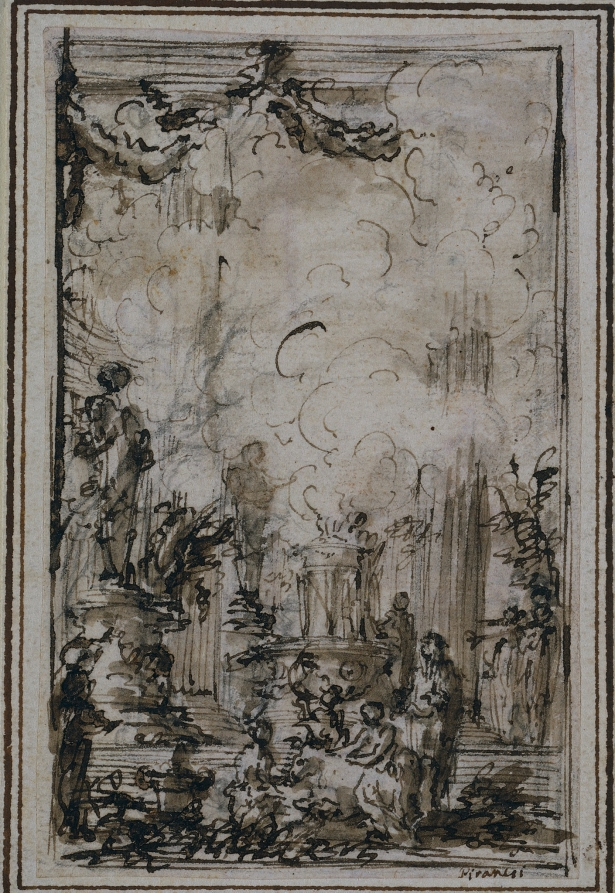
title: Sacrificial Offering in a Temple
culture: Italy, 18th century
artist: Giovanni Battista Piranesi (Italian, 1720–1778)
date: after 1750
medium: pen and brown ink and brush and brown and gray wash; framing lines in brown ink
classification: Drawing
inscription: falsley signed, lower right, in brown ink: Piranesi ; VERSO OF SECONDARY SUPPORT, center, in brown ink: Piranese ; upper left, in graphite: 9421 [underlined]